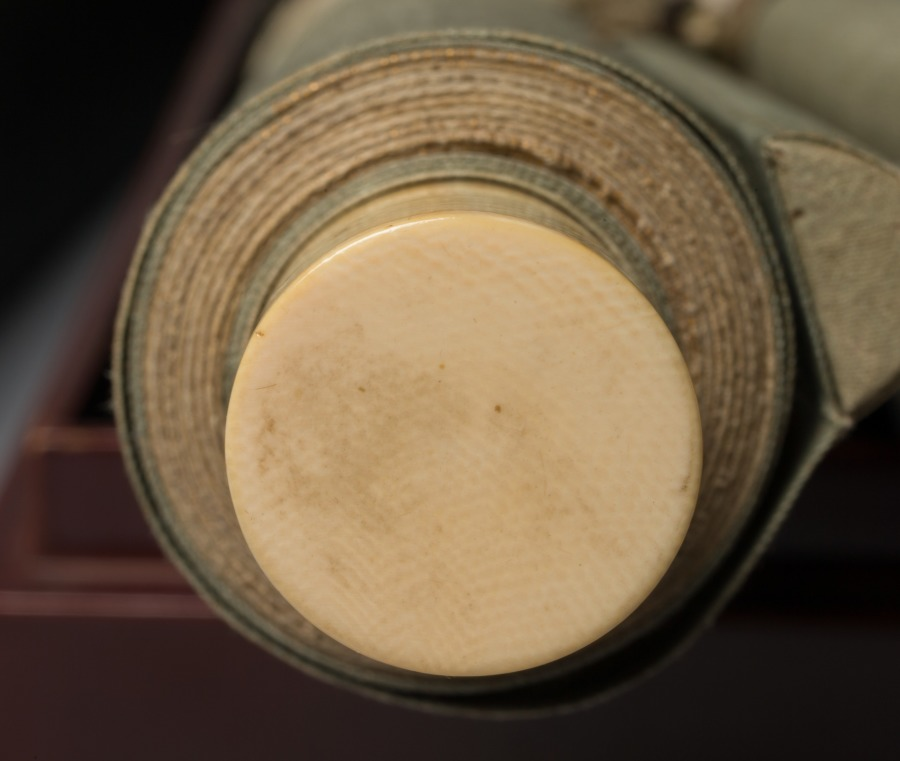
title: Fish and Rock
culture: Japan, Momoyama period (1573–1615)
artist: Rinkyo (Japanese)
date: 1573–1615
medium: one of a pair of hanging scrolls; ink on paper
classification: Painting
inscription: artist's seal at mid-left edge of painting.